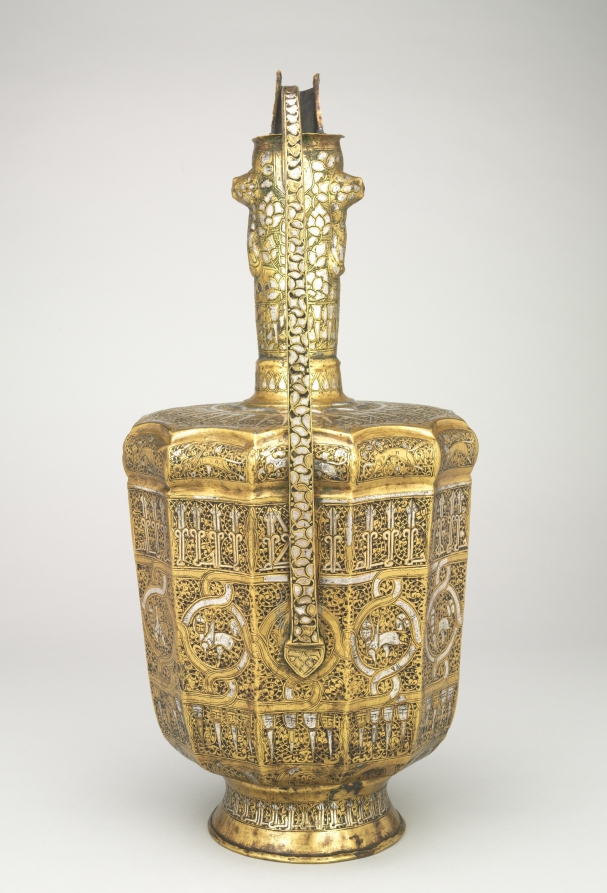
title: Twelve-sided Ewer with Sphinxes and Human-Headed Inscriptions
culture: Iran, Khurasan, Ilkhanid period (1256–1353)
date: 1300–1350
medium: hammered sheet of brass inlaid with silver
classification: Metalwork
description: The spout and neck of the ewer display a crouching and seated lion in raised relief. Winged hare-like animals march around the top of the body, set off by foliate scrolls, while sphinxes process around the center. The bottom of the ewer’s body is encircled by an inscription with human heads, which only appear on metalwork in Islamic art. Ewers like this, and similar elaborate vessels, would have been used in court banquets and elite homes across the Islamic world.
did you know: Calligraphy with human heads, known as animated script, developed in northeast Iran during the 1100s.